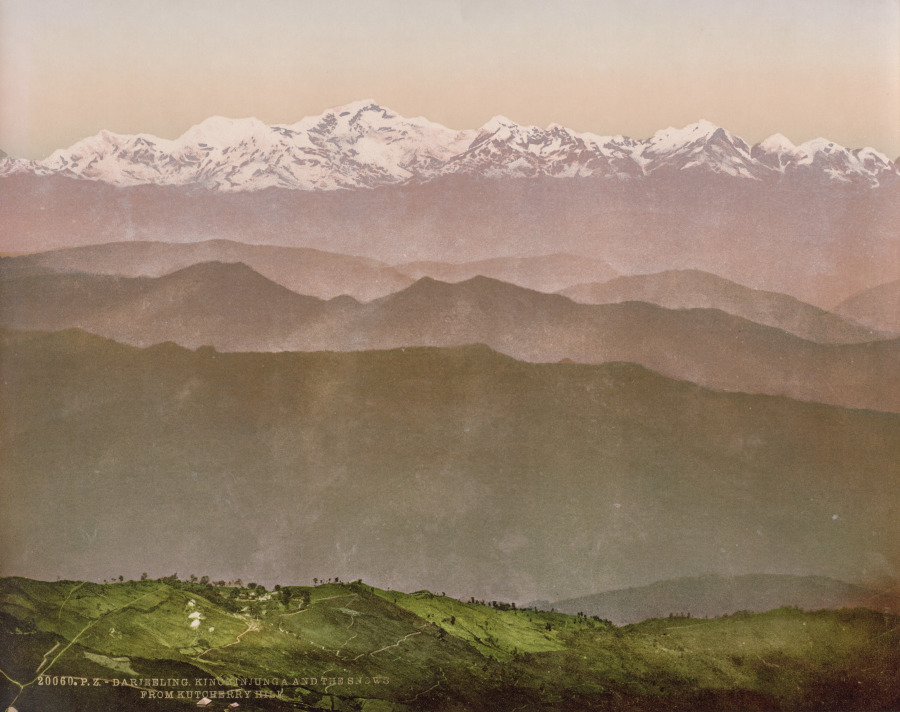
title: Darjeeling. Kinchinjunga and the Snows from Kutcherry Hill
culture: India, 19th century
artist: Photoglob Co. (Zurich, active c. 1890–1910)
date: 1890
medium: Photochrom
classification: Photograph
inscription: Imprinted in gold on recto in lower left corner: “20060. P.Z.-DARJEELING. KINCHINJUNGA AND THE SNOWS/FROM KUTCHERRY HILL”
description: The photographer chose a very high horizon line in order to emphasize the grandeur and scale of the mountains and foothills of the Lesser Himalayas. In the foreground, the human settlements are dwarfed by nature’s creation, but the greenery they offer is refreshing and hospitable in contrast to the severity of the rock and cragged, snow-covered peaks.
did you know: The largest peak in the background is Kinchinjunga, the third highest mountain in the world and the tallest in India.